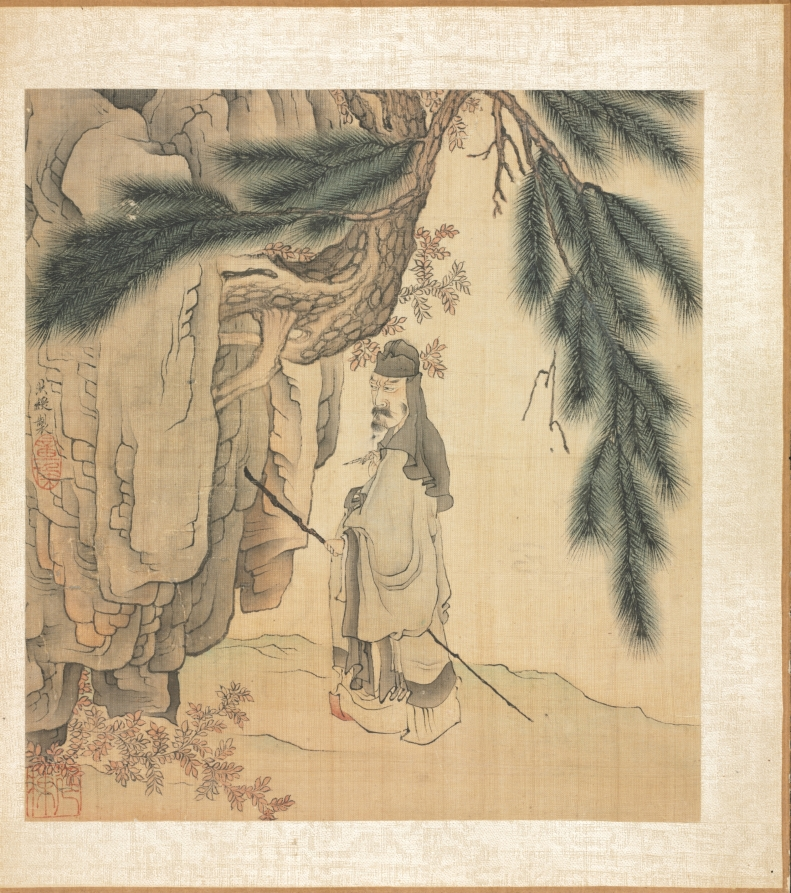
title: Paintings after Ancient Masters: Scholar with Staff and Brush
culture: China, Ming dynasty (1368–1644)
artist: Chen Hongshou (Chinese, 1598/99–1652)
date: 1598–1652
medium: album leaf; ink and color on silk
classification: Painting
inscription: Hongshou [seal] Zhanghou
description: The twenty paintings in this double album by Chen Hongshou include landscapes, figures, and flowers. It also has one leaf featuring a woman, an often-used subject not found in the other albums from the latter part of his career. His late works are wonderful summations of Chen's peculiar and quirky art—archaistic, hyper-refined—but without accompanying shallowness or sentimentality. His figures and landscapes in the late albums are miniaturized, not unlike the small Chinese gardens, or the carefully selected small table rocks or old roots used for contemplation to see the world in miniature. This loss of scale is quite deliberate and reflects the psychological situation of a depressed class like the Ming loyalist officials and scholars, deprived of their integrity and honor, and forced to lead a diminished and restricted existence.